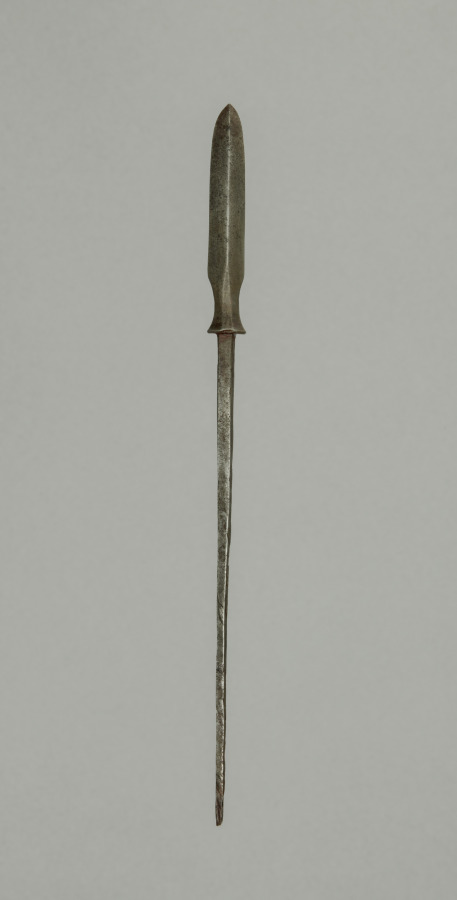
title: Arrow Point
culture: Japan, Edo period (1615–1868)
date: 1700s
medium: steel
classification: Arms and Armor